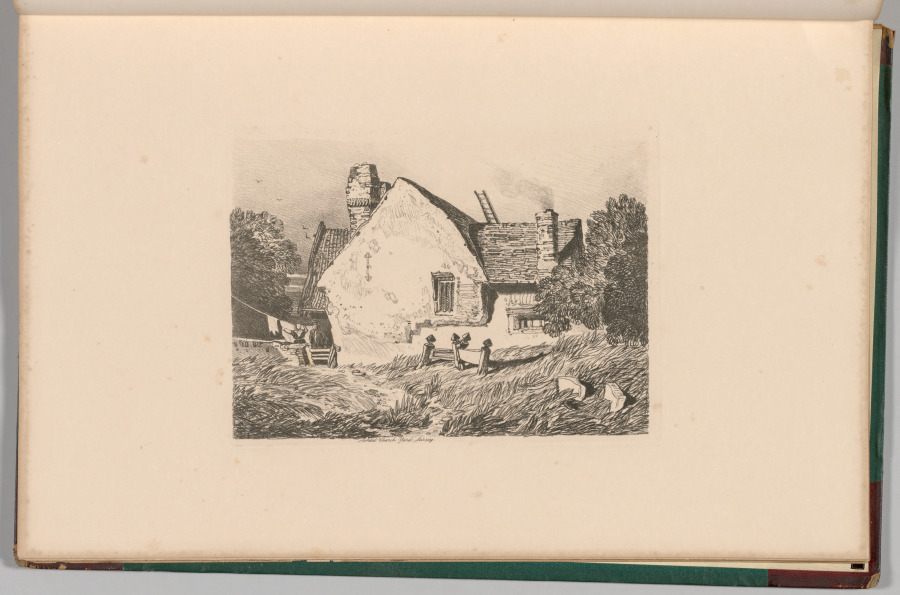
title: Liber Studiorum: Plate 39, View at Ashdted, Surrey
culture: England, 19th century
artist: John Sell Cotman (British, 1782–1842)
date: 1838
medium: softground etching, from a bound volume containing 48 plates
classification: Bound Volume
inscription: In plate, within image, upper right: 39; in plate, below image: Ashted Church Yard, Surrey